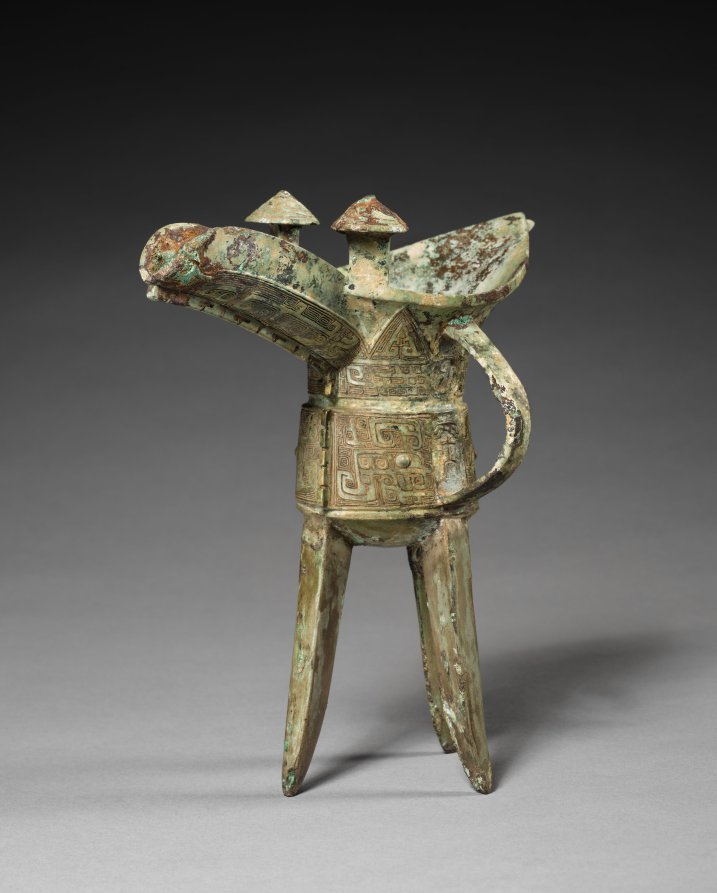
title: Wine Cups (Jue)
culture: China, Shang dynasty (c. 1600–c. 1046 BCE), Anyang phase (c. 1250–1046 BCE)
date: c. 1200 BCE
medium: bronze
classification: Metalwork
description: Wine and food played a major role in ritual offerings to the ancestral spirits and the Supreme Ancestor (Shangdi) performed by the Shang rulers in the state cult of ancestor worship. A variety of wine vessels—each type given a specific name—was cast to bear witness to the power and artistic vitality of this remote civilization. This example of a jue wine cup is for libations. Other major types of wine vessels include jia (wine warming vessel), fangyou (square wine container), and gu (beaker with a trumpeted mouth for pouring).